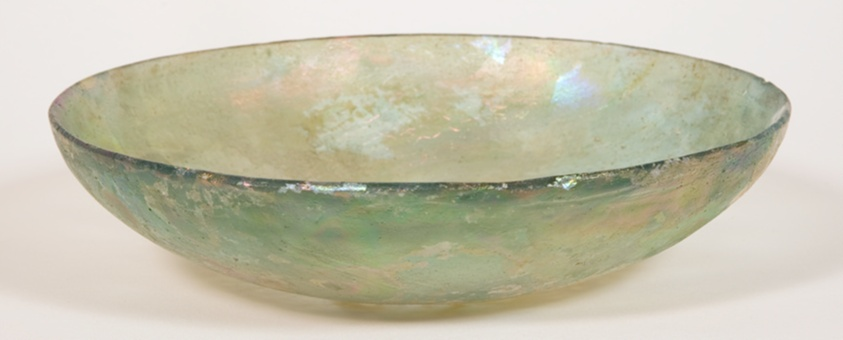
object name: Vessel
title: Bowl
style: syrian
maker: Roman, Syria or Palestine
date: late 1st century BCE-early 1st century CE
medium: Glass, sagged, rotary-polished and fire-polished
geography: Syria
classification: bowl; glass; vessel; ancient art